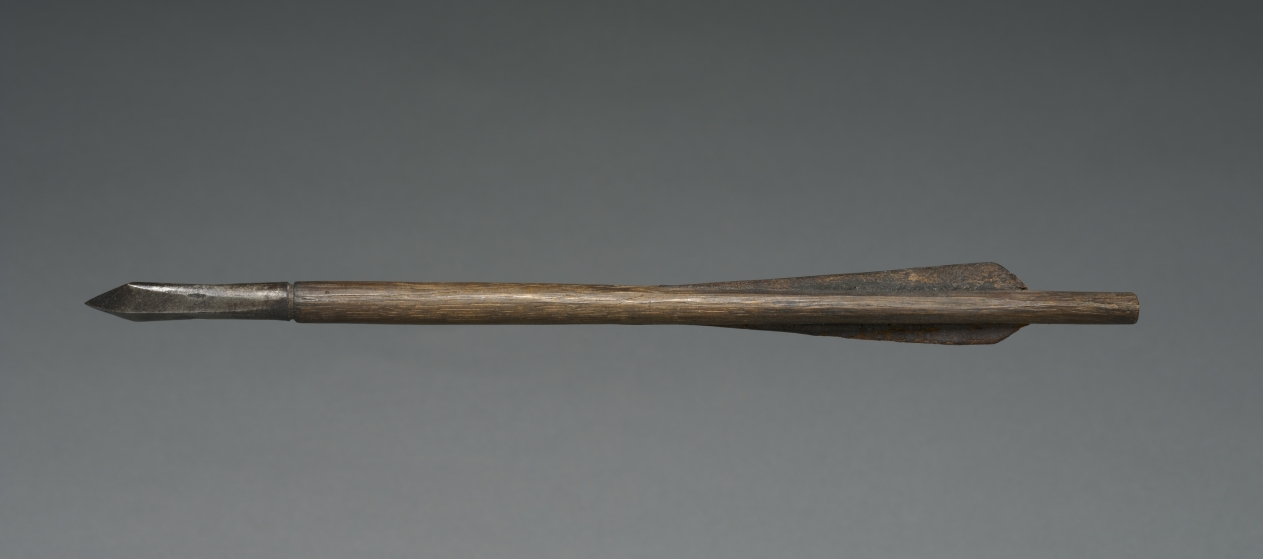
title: Crossbow Bolt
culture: Germany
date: 1500s–1600s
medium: wood, leather, steel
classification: Arms and Armor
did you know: Bolts with leather feathering were used mainly in the Tyrolean area, which includes northern Italy and western Austria.